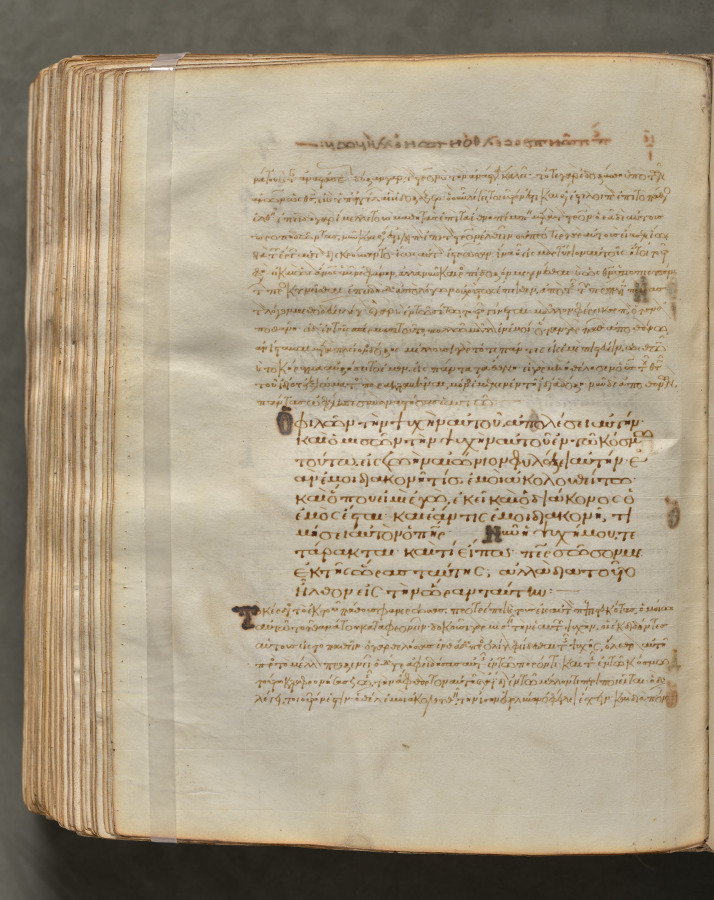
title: Text, folio 384 (verso), from a Gospel Book with Commentaries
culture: Byzantium, Constantinople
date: c. 1000–1100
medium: ink, tempera, and gold on vellum; leather binding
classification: Bound Volume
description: Each of the four gospels in this book opens on a page with brilliantly illuminated borders depicting the author of the text as well as birds—principally peacocks, symbols of the immortality of the soul—and fountains, representing the fountain of life and the salvation of the soul. This volume consists of 428 leaves with texts in Greek. Its level of sophistication suggests that it was probably written and decorated in a monastery in Constantinople.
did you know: Gospel books were carried in procession through Byzantine churches.